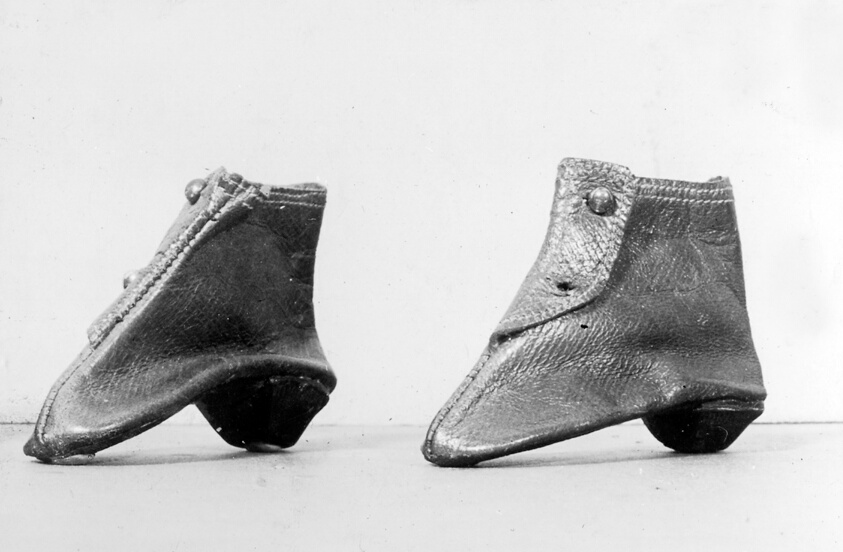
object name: Textile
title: Doll's Shoes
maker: United States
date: 19th century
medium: Blue leather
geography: United States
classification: textile; shoes - misc; costume accessory - shoe